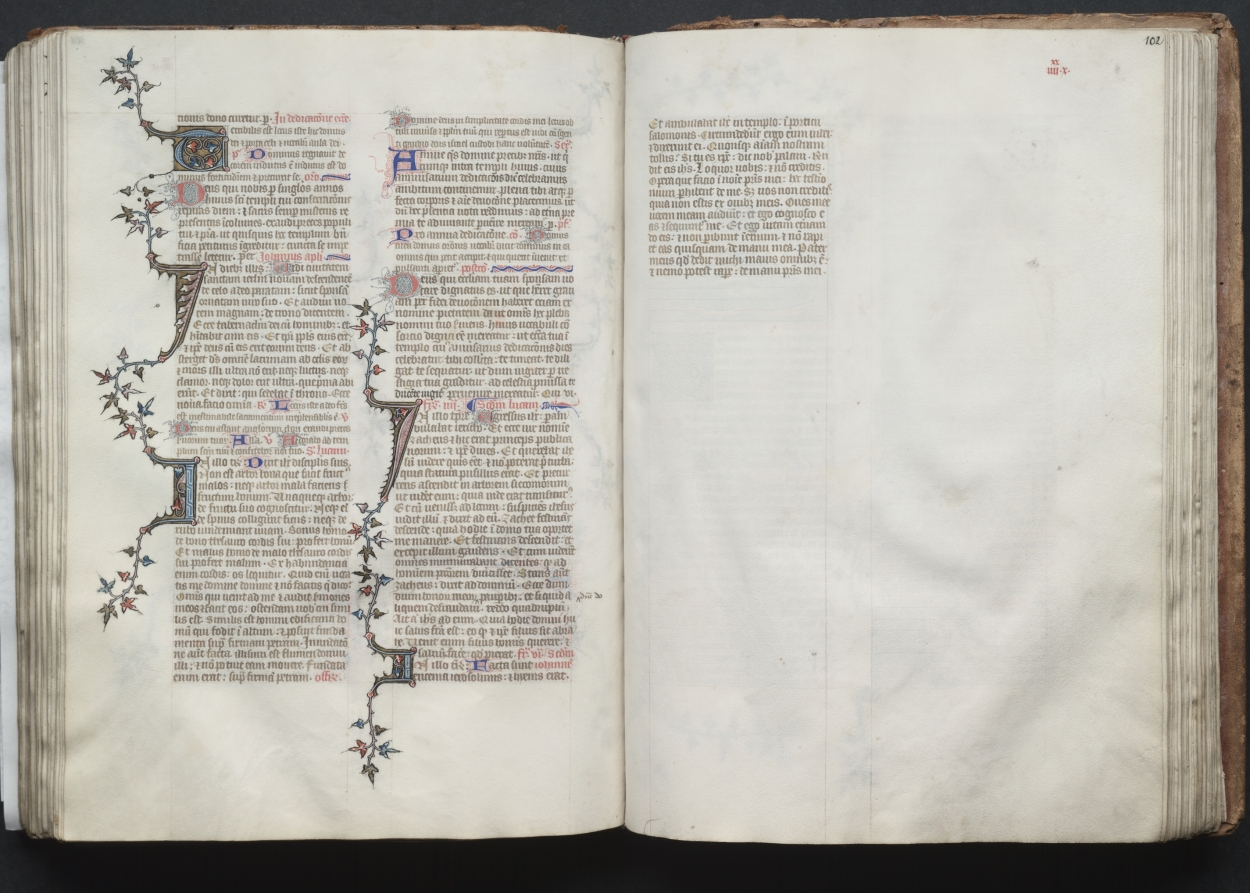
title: The Gotha Missal: Fol. 101v, Text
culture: France, Paris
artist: Master of the Boqueteaux (French)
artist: and Workshop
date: c. 1375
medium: ink, tempera, and gold on vellum; blind-tooled leather binding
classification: Bound Volume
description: The style and quality of this manuscript's decoration is typical of deluxe Parisian books made for aristocratic or royal patrons. Most of the book's decoration appears to be the work of the Master of the Boqueteaux, an artist active at the court of King Charles V (died 1380). His style was apparently shared by a number of book illuminators working in and around Paris. It is very possible that the Gotha Missal belonged to Charles V, but is not provable because the manuscript has no royal portraits and lacks a colophon. Given the book's magnificent decoration, however, it would seem that it was produced for a Valois prince, if not for the king himself. The manuscript receives its name from the German dukes of Gotha, its later owners.